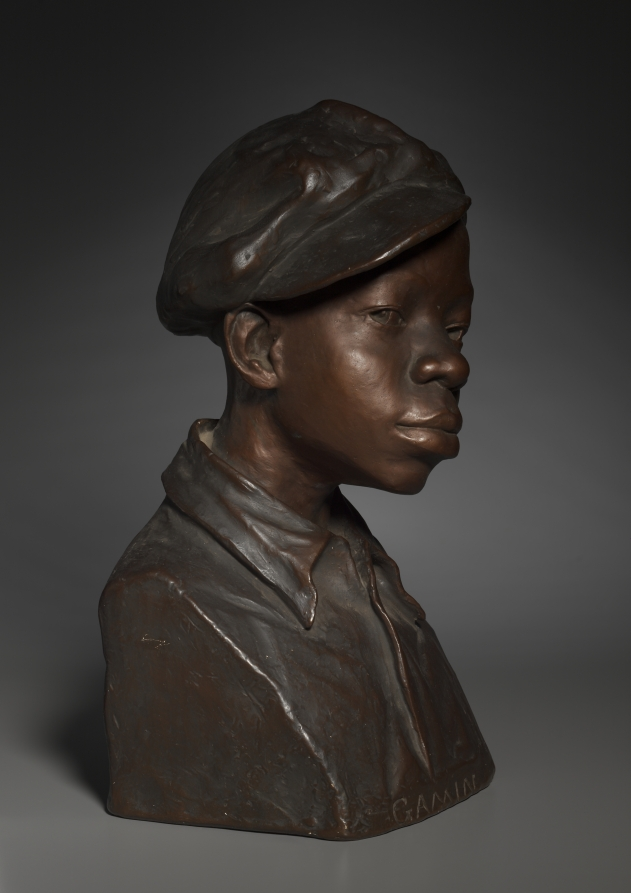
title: Gamin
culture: America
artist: Augusta Savage (American, 1892–1962)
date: c. 1929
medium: hand-painted plaster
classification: Sculpture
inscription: signed on right-side: "Savage"; titled across the bottom-front: "Gamin"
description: Augusta Savage was the most acclaimed sculptor working during the Harlem Renaissance of the 1920s and ‘30s, and Gamin is her most famous work. It was long thought that the image was a generic figure; however, recent research reveals that it depicts her nephew. The warm characterization likely arises from the close bond shared between artist and model. Although several small versions of the sculpture were produced, this life-size, hand-painted plaster is unique, and likely the oldest surviving example of the subject.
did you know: A trailblazer, Savage was the first African American member of the National Association of Women Artists.